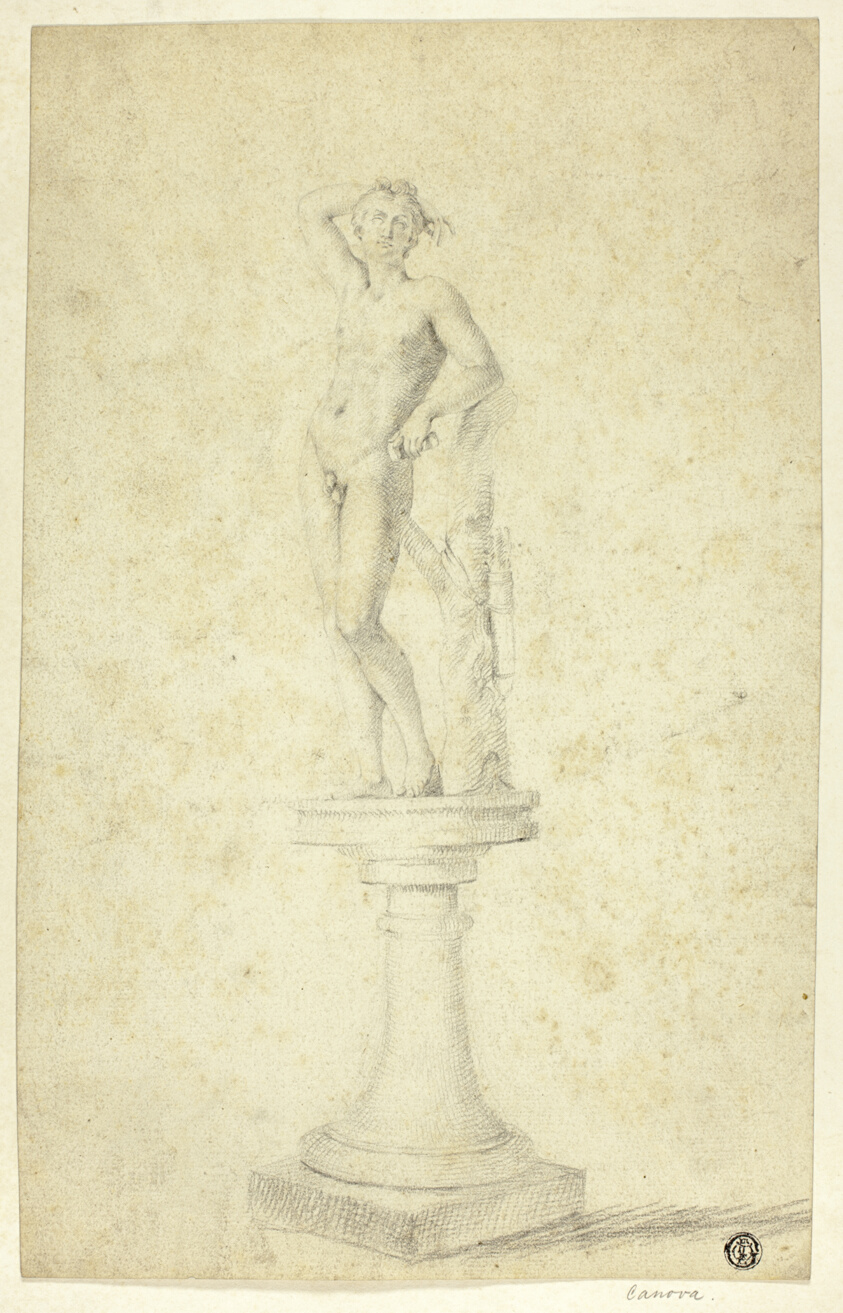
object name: Drawing and Watercolor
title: Statue of Apollo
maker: Unknown Artist; French, 18th century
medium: Black chalk on cream laid paper, tipped onto cream wove paper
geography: France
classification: chalk; drawings (visual works); prints and drawing